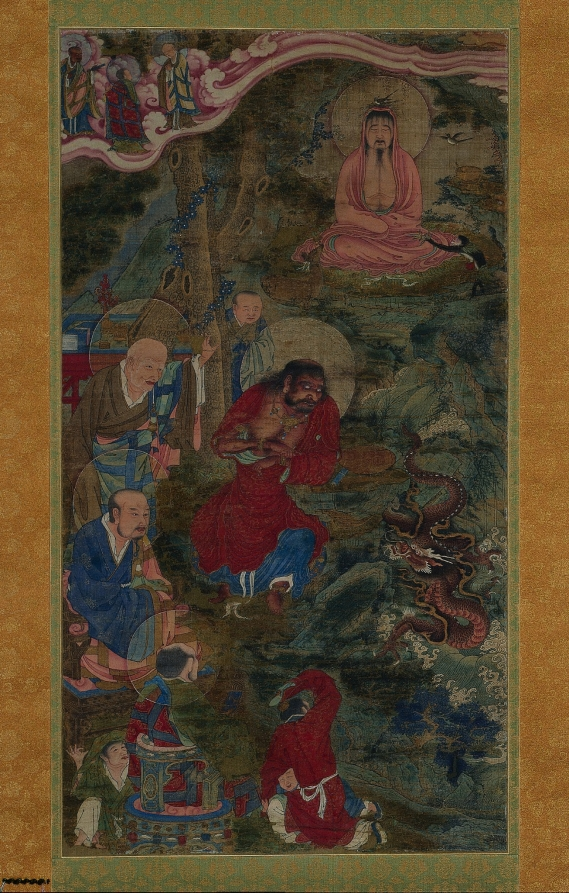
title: Miracle of the Dragon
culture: China, Ming dynasty (1368–1644)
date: 1600s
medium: Hanging scroll; ink, color, and gold on silk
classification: Painting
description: Buddhist disciples are grouped around a dragon in the lower right part of the scroll. The figures' varying levels of composure at the miraculous appearance of the dragon indicates how far removed each figure is from worldly affairs. The lay people's body language expresses their surprise. In contrast, the historical Buddha, Shakyamuni, in the upper right has been seated in meditation for such a long time that birds have begun assembling twigs for a nest atop his head. His eyes remain closed, and his body still, unmoved by either the sudden materialization of the dragon or the proximity of the monkey, deer, and birds. Dragons have been part of Buddhist culture since antiquity; in Chinese Buddhism the dragon is often interpreted as a symbol of enlightenment.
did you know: The generous application of brilliant mineral pigments is still evident throughout this painting.